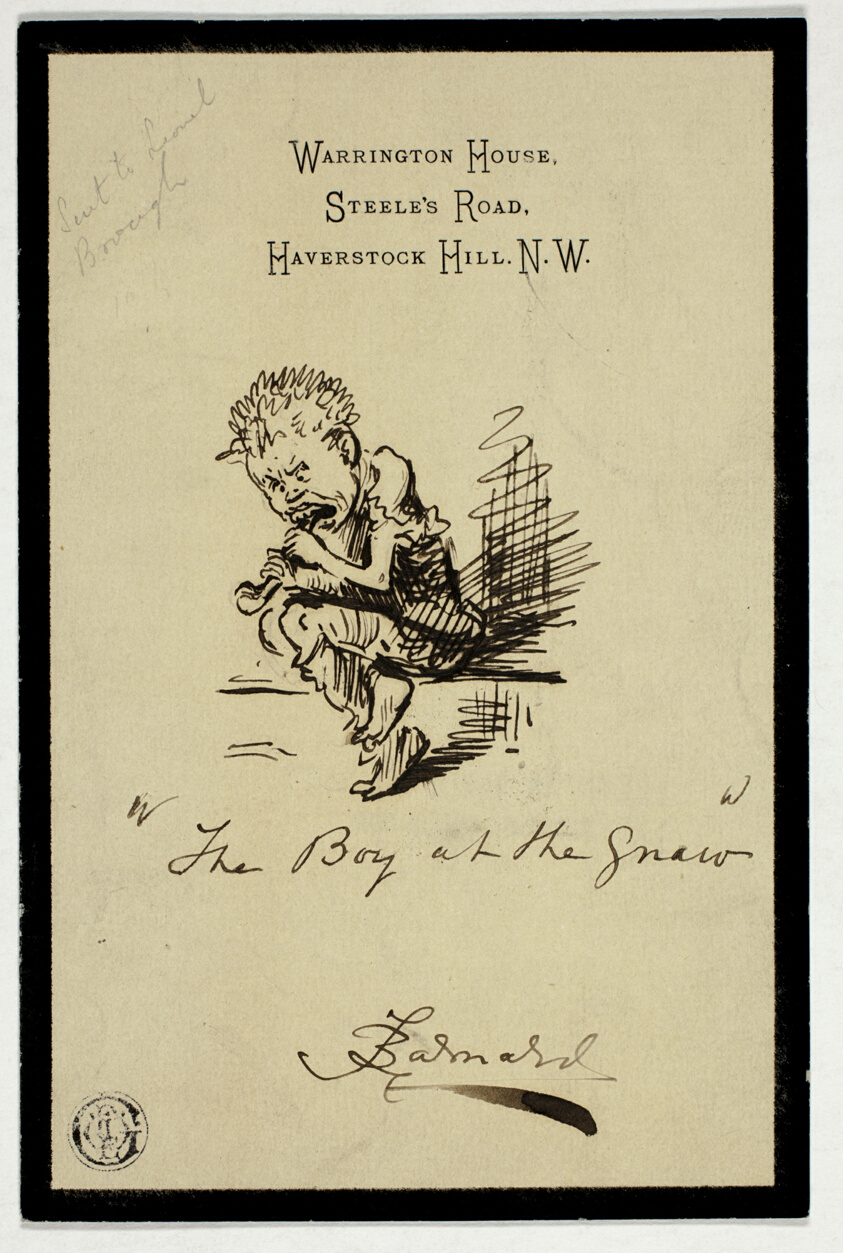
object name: Drawing and Watercolor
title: The Boy at the Gnaw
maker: Frederick Barnard (English, 1846-1896)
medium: Pen and brown ink, over graphite, on cream laid paper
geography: England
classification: pen and ink drawings; paper; drawings (visual works); prints and drawing